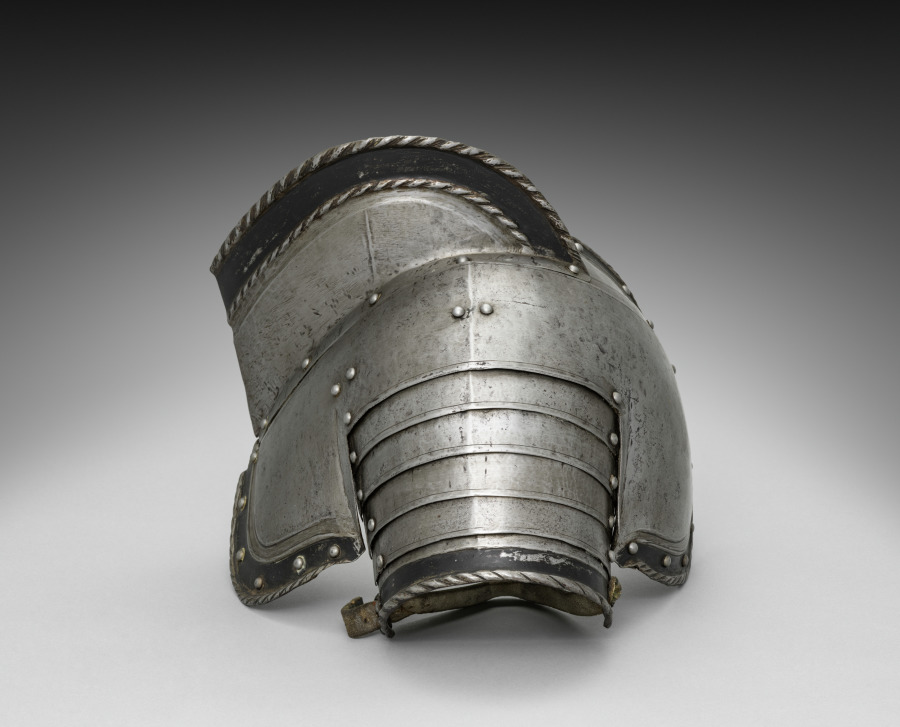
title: Left Pauldron with Guard Brace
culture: Germany, 19th century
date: 1801–1900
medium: steel with black paint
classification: Arms and Armor